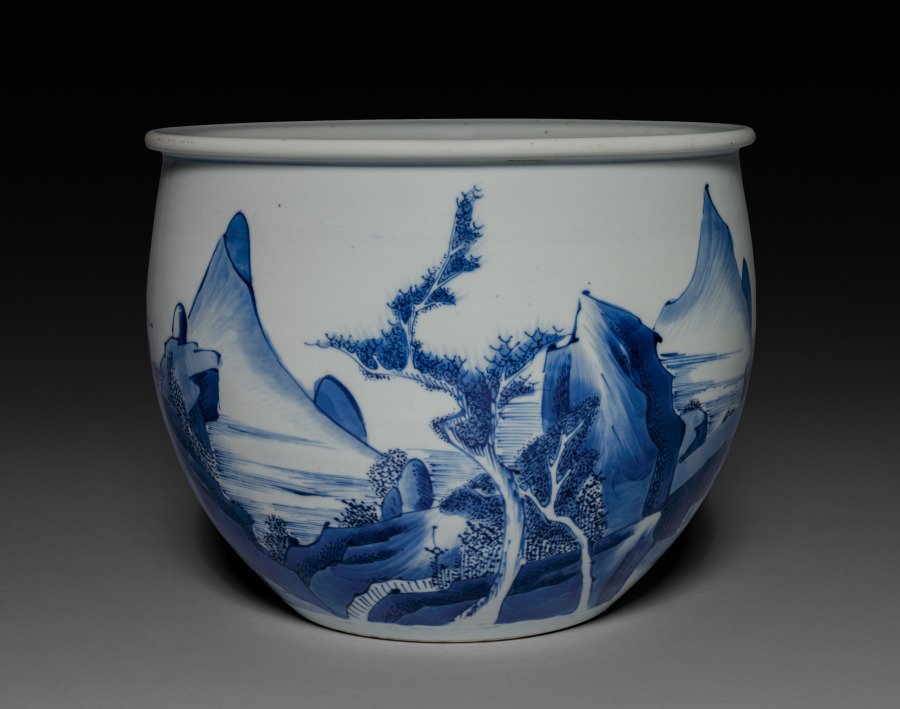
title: Pot with Landscape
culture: China, Jiangxi province, Jingdezhen kilns, Qing dynasty (1644-1911), Kangxi reign (1662-1722)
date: 1662–1722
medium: porcelain with underglaze blue decoration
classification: Ceramic